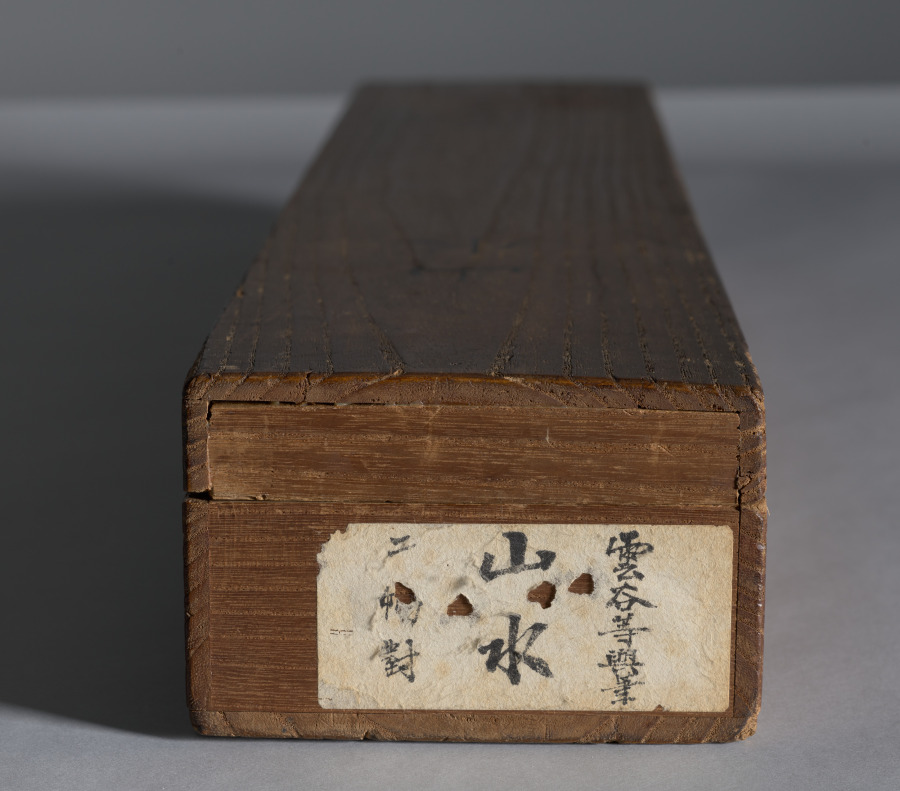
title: Landscapes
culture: Japan, Edo period (1615–1868)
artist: Unkoku Tōyo (Japanese, 1612–1688?)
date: mid- to late 1600s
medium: pair of hanging scrolls; ink and light color on paper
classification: Painting